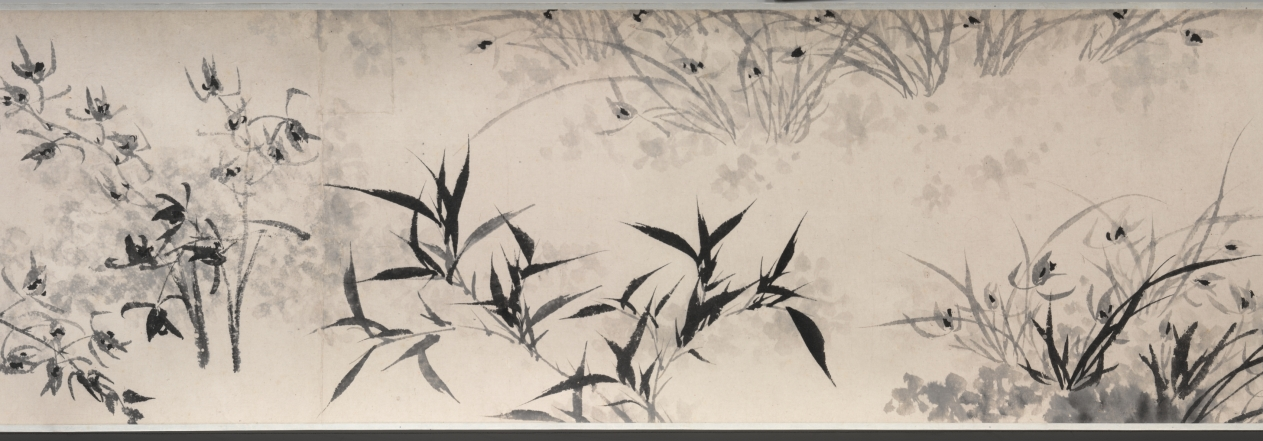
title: Rocks, Orchid, and Bamboo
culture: China, Qing dynasty (1644-1911)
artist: Shitao (Chinese, 1642–1707)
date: 1662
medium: handscroll; ink on paper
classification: Painting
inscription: Title colophon in four characters with signature and two seals on gold-flecked paper.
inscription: Artist's signature, inscription (with date of 1662), five seals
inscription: Colophon with two seals.